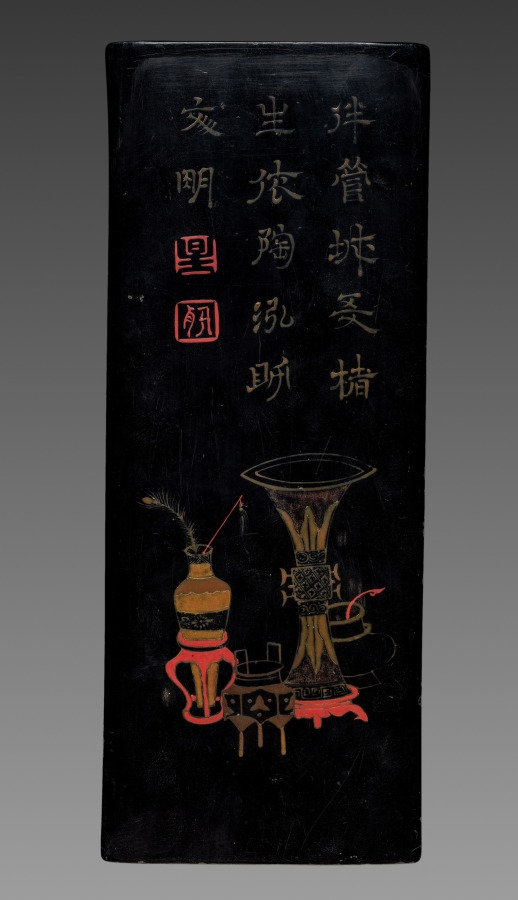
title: Ink Cake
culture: China, Qing dynasty (1644-1911)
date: 19th Century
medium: ink cake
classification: Miscellaneous